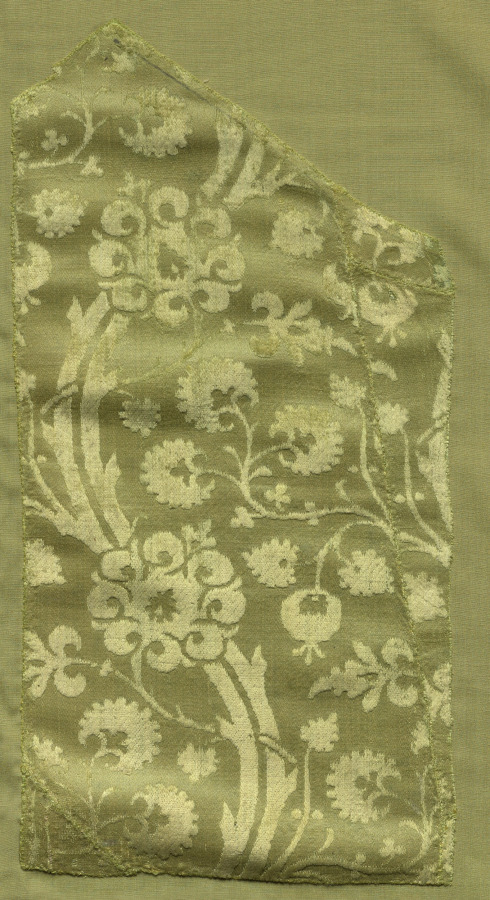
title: Fragment of a Chasuble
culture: Italy, beginning of the 15th century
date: 1400–1420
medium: velvet (cut and voided); silk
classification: Velvet